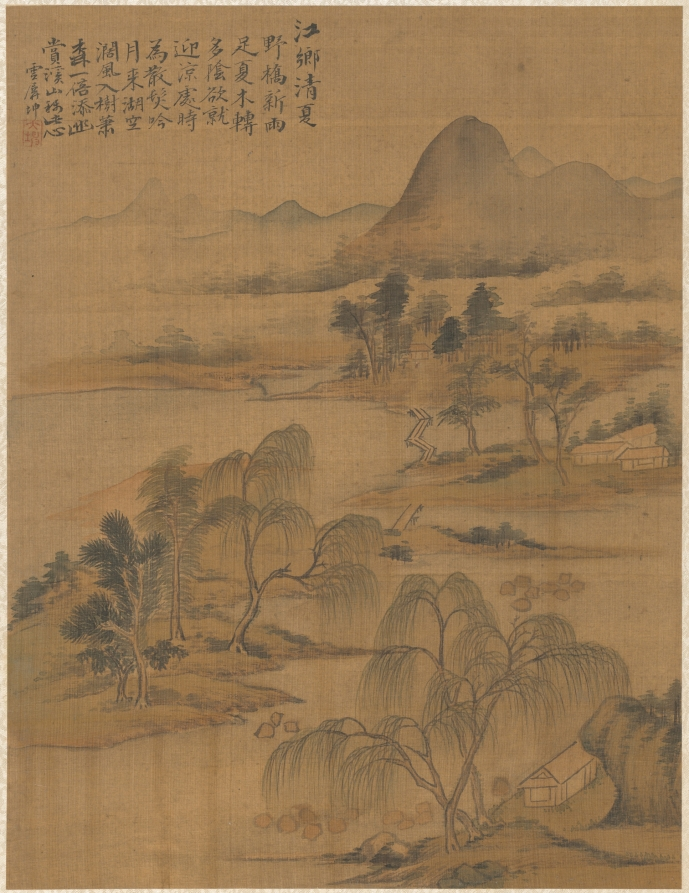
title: River Village in High Summer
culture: China, Qing dynasty (1644-1911)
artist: Zhai Dakun (Chinese, d. 1804)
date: 1775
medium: album leaf; ink and color on silk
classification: Painting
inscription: River Village in High Summer. New rain has soaked the rustic bridge, The summer trees cast abundant shade. One wants to go among them and find a cool spot, From time to time one laughs, one's hair disheveled. The moon shines over the vast empty lake, The wind blows through the lonely trees. These add completely to one's secret enjoyment, Streams and mountains accord with this mind. Yunping Kun. Seal: r/r "Dakun"